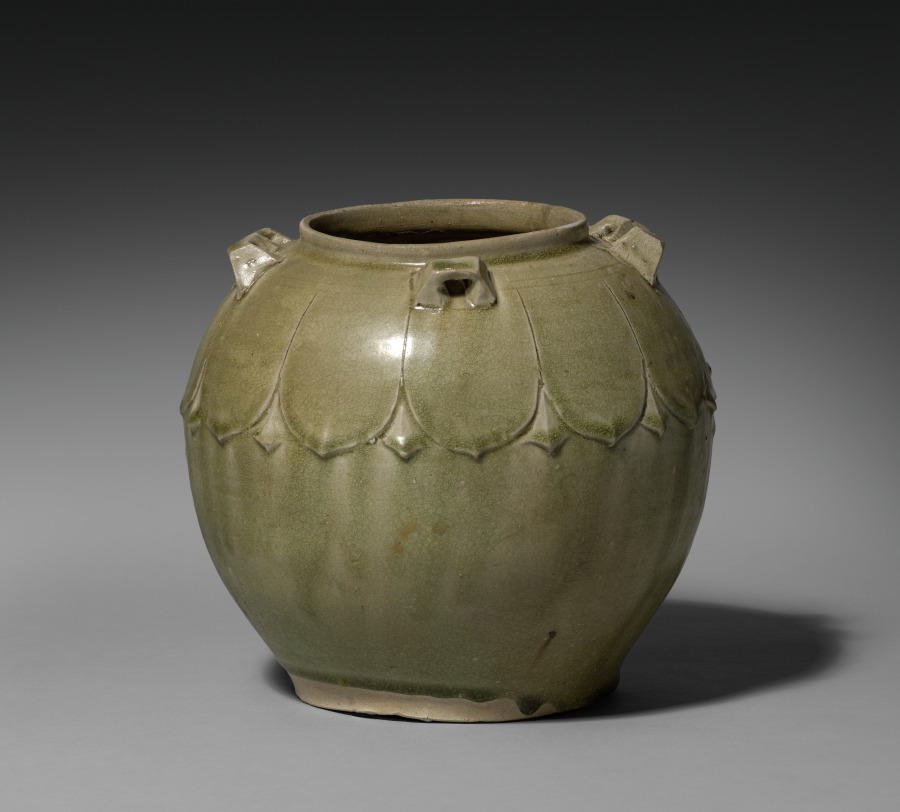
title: Covered Jar with Carved Lotus Petals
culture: China, Northern Dynasties period (386-581)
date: 386–581 CE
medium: Glazed stoneware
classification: Ceramic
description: This jar still has its original cover, which is rare among surviving examples. Its missing knob most likely had the shape of a lotus bud. Beautifully carved lotus petals cover the vessel’s shoulder and lid under a translucent green glaze. In Buddhism, the lotus is a flower symbolizing purity and detachment from worldly affairs; its presence suggests that this vessel was meant to be used in a religious context. The well-crafted double loop handles may have held a silk cloth or other textile that would have been folded over the lid to keep it in place. This aesthetic prefigures the celebrated green celadons in adjacent regions.